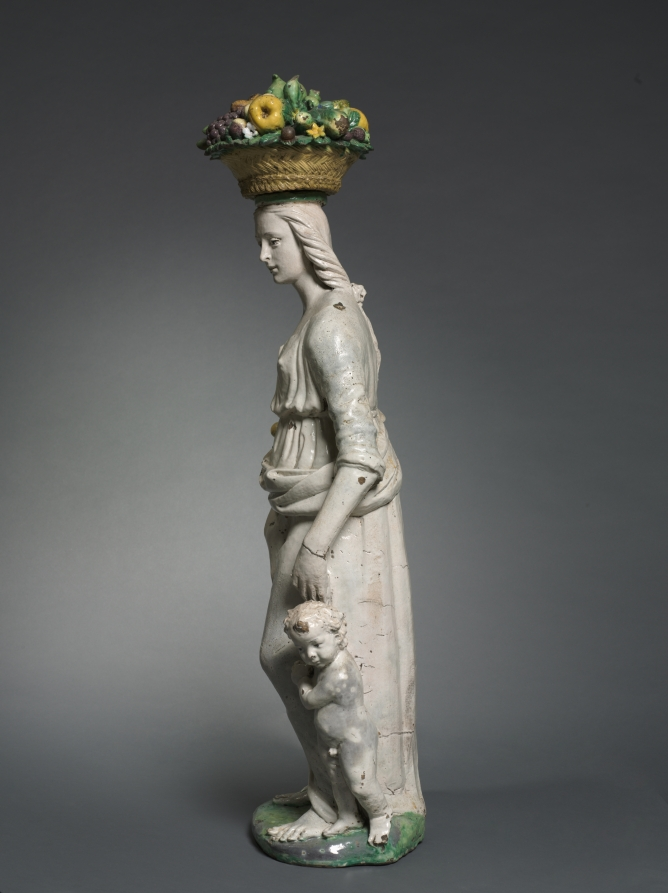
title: Dovizia (Plenty)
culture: Italy, Florence, 16th century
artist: Giovanni della Robbia (Italian, 1469–1529/30)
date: c. 1520–29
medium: glazed terracotta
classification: Sculpture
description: Many elite Florentine Renaissance homes had sculptures of idealized young women carrying nature’s bounty, such as this work. The motif stems from a statue by Donatello (about 1386–1466) that towered over Florence’s main public market. At home, however, the sculpture became a talisman for the family’s well-being. The city-state’s low birth rate was a serious political matter, and such a sculpture was believed to stimulate fertility while also promoting motherhood and bolstering financial success.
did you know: Inspired by an over life-sized, public sculpture by Donatello, Giovanni della Robbia reduced the figure for a domestic setting.